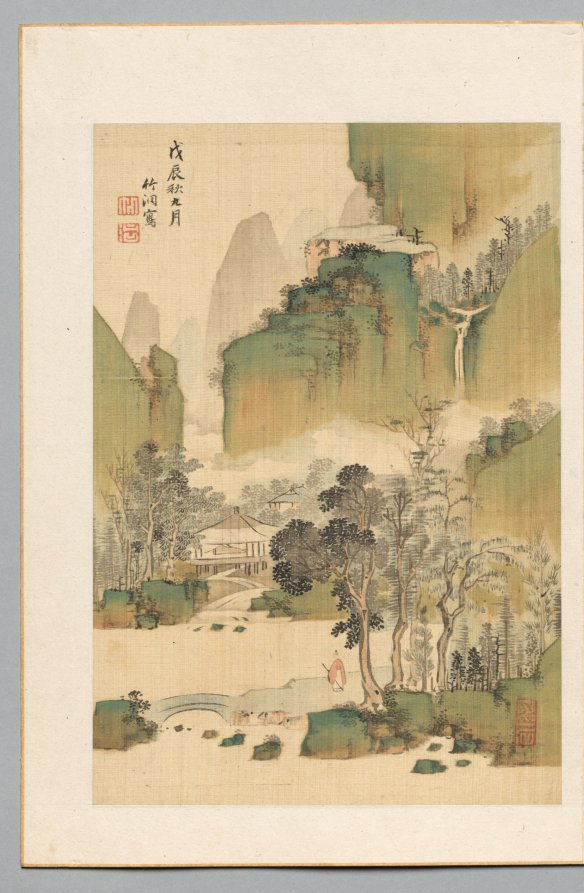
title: Landscape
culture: Japan, Edo period (1615–1868)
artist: Nakabayashi Chikutō (Japanese, 1776–1853)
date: 1808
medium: leaf from a pair of folding albums; ink and light color on paper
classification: Portfolio